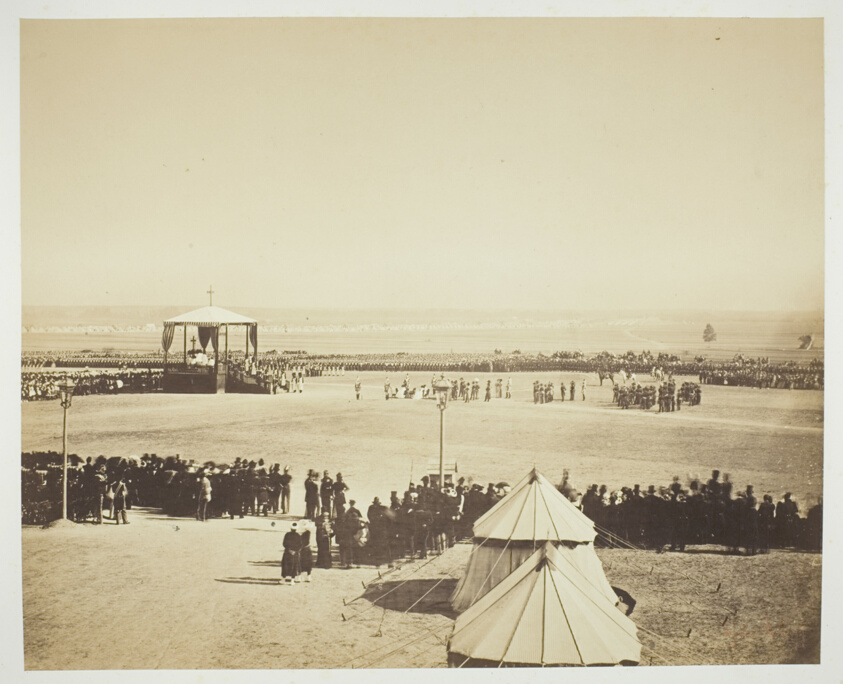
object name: Photograph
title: Mass, Camp de Châlons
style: 19th century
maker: Gustave Le Gray (French, 1820–1884)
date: 1857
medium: Albumen print, from the album "Souvenirs du Camp de Châlons"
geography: France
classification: albumen silver print; photographic process; photography; photograph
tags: Paris